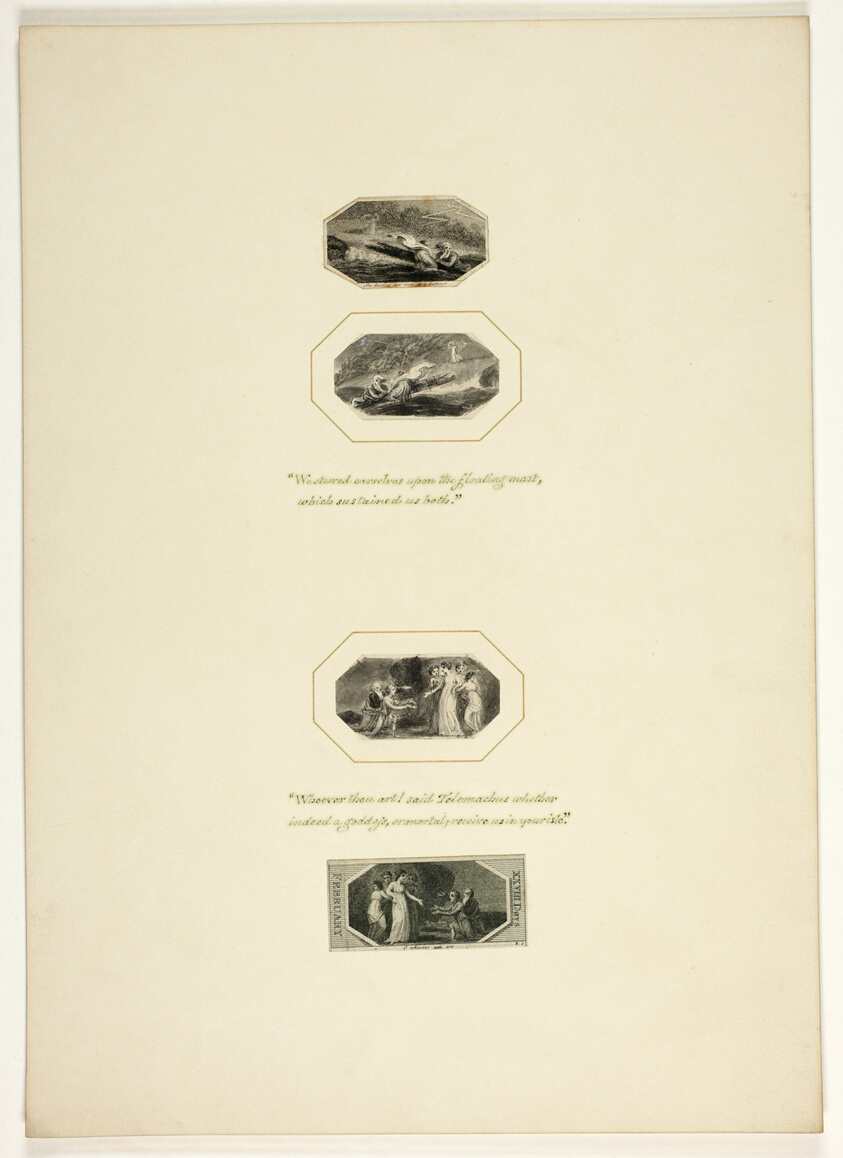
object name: Print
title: Plate from Telemachus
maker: after Thomas Stothard (English, 1755-1834); published by T. Baker (English, 19th century)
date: c. 1797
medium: Engraving on paper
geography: England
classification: engraving; drawings (visual works); prints and drawing; print